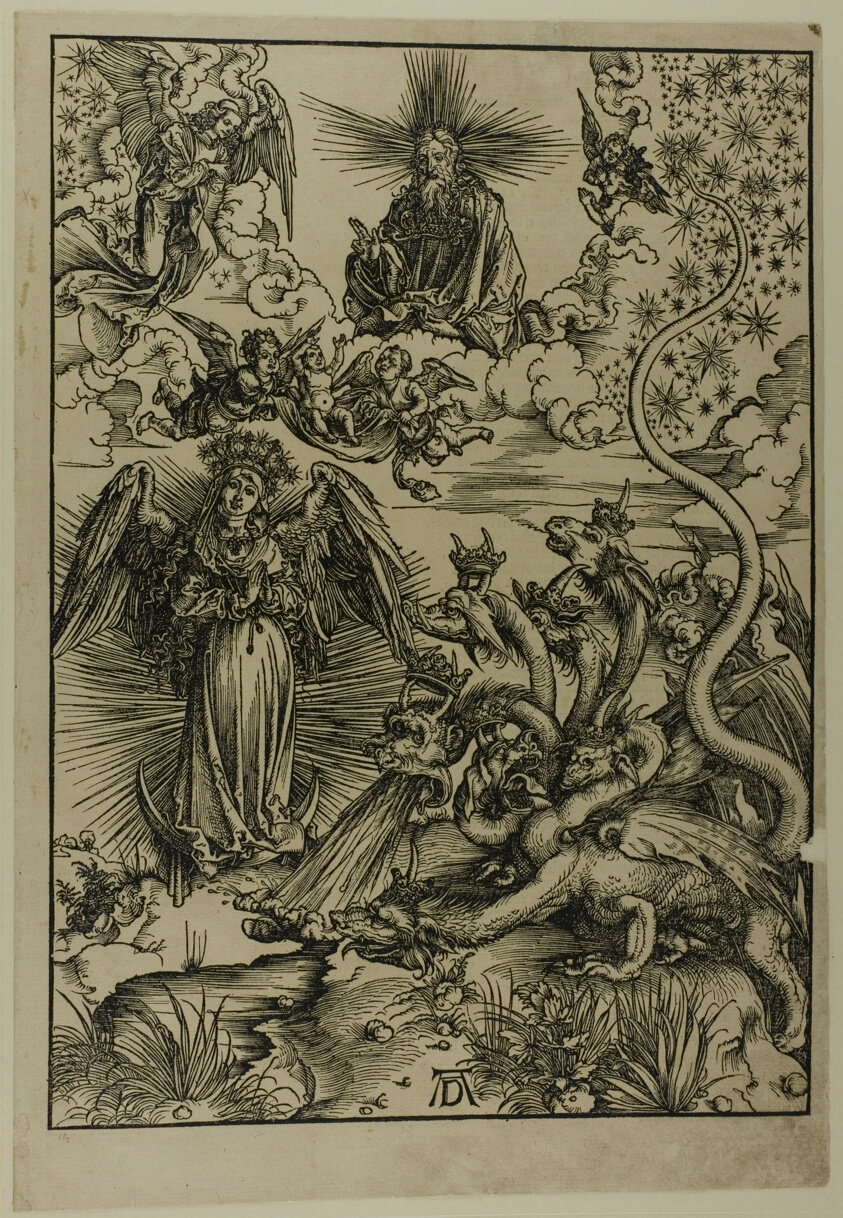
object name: Print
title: The Apocalyptic Woman, from The Apocalypse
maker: Albrecht Dürer (German, 1471-1528)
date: c. 1496–98, published 1511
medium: Woodcut in black on tan laid paper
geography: Germany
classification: woodcut; print; prints and drawing; paper